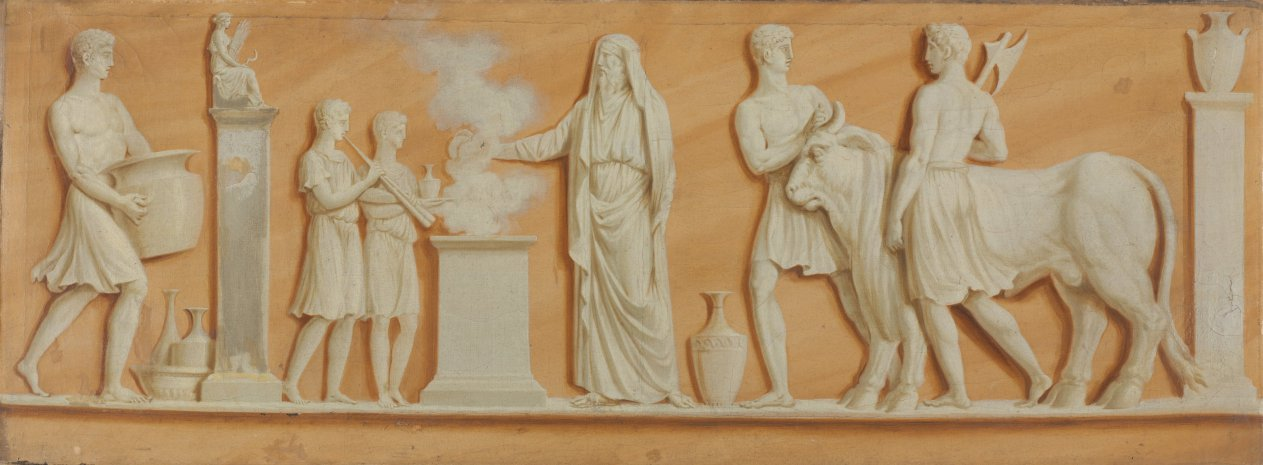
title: Overdoor Painting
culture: France, 18th century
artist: Pierre Rousseau (French, 1751–1829)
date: 1790s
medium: oil on canvas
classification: Painting